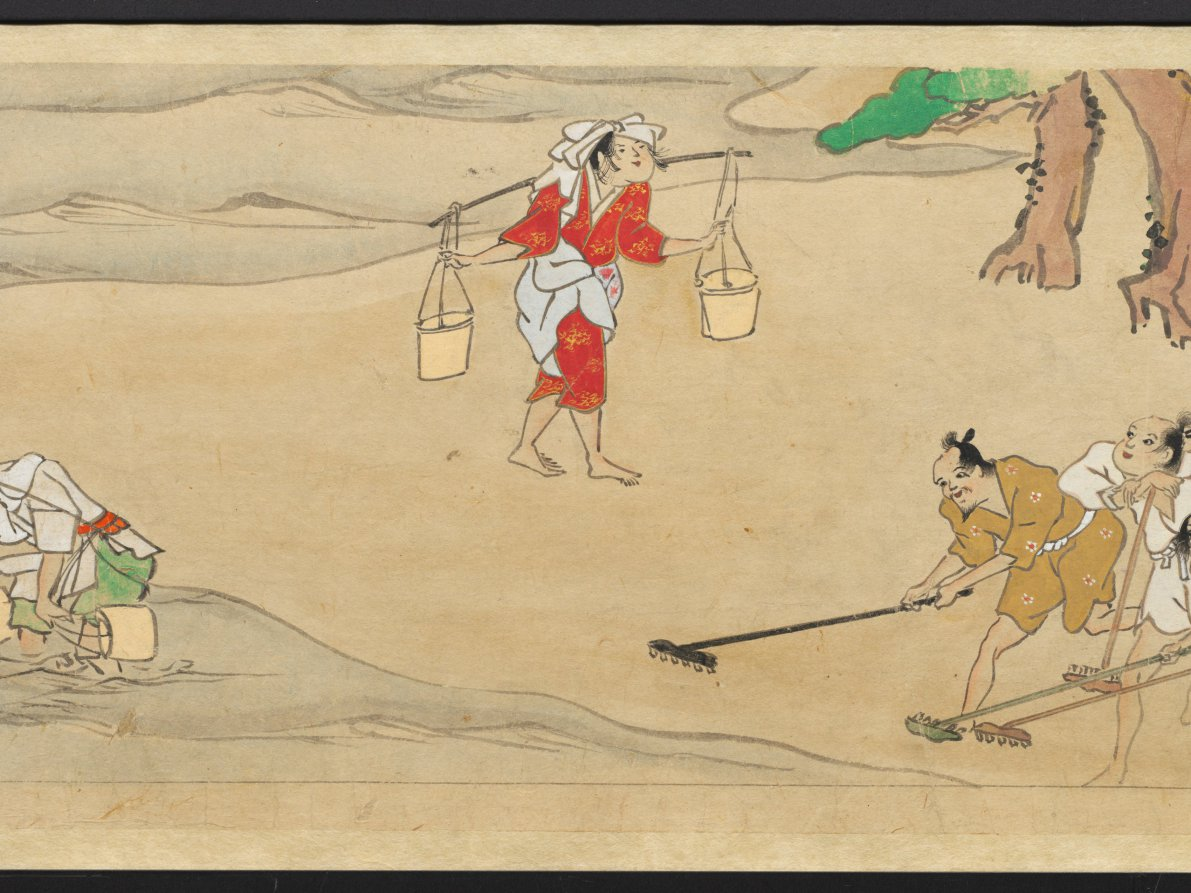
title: The Saltmaker's Story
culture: Japan, Edo period (1615–1868)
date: early 1600s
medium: One of a pair of handscrolls; ink, color, and gold on paper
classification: Painting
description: Once read and copied by girls at New Year’s celebrations and included in dowries, The Saltmaker’s Story is a rags-to-riches tale in which daughters are gifts from the gods. Despite his simple outlook, the main character progresses from humble roots as an associate at Kashima Shrine to the elite status of grandfather of the emperor through the intervention of the Kashima deity. The Saltmaker’s Story is traditionally presented in a set of three scrolls, but the text of this set has been removed by a previous owner, who remounted the illustrations as a pair. The paintings of this one take us from right to left through the first half of the tale.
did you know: This handscroll originally had texts before its paintings, but the texts were removed.